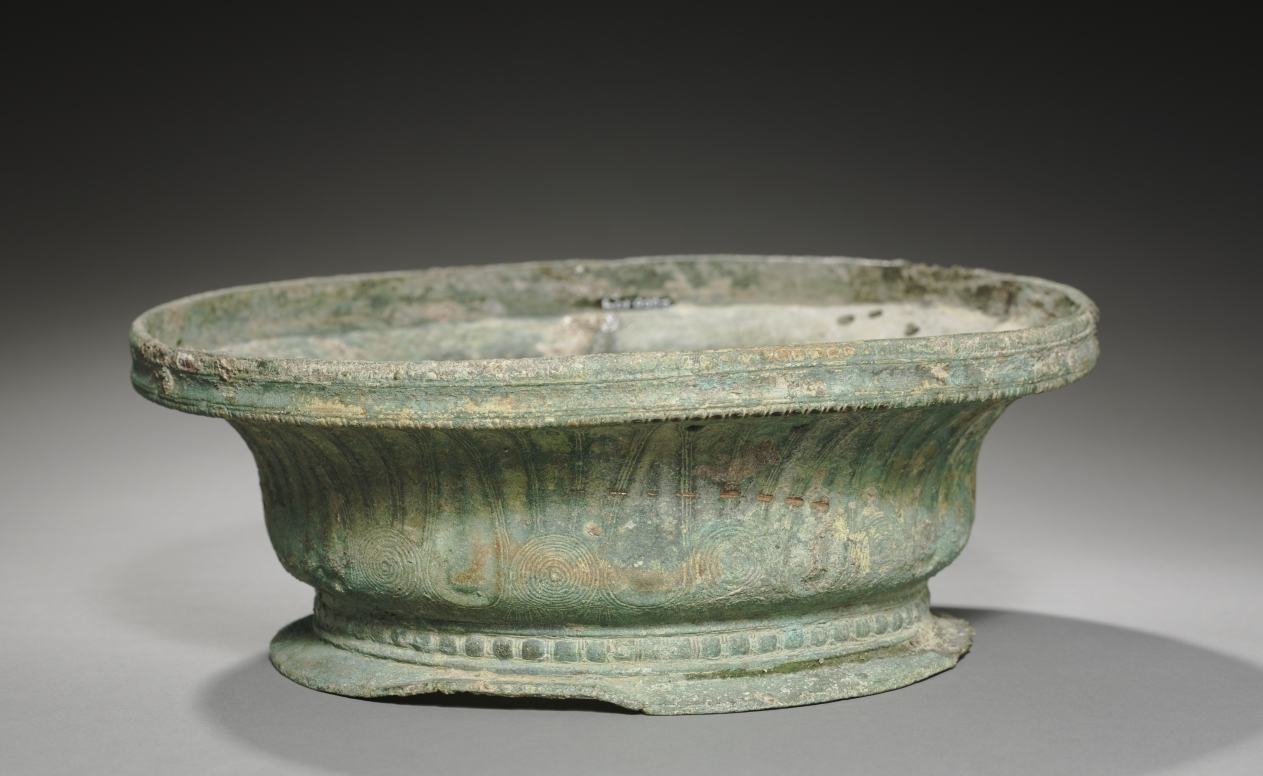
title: Bronze Volute Krater Base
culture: Greece, Laconia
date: late 600s BCE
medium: bronze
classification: Metalwork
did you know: This object supported a large vessel used for mixing wine with water called a krater.